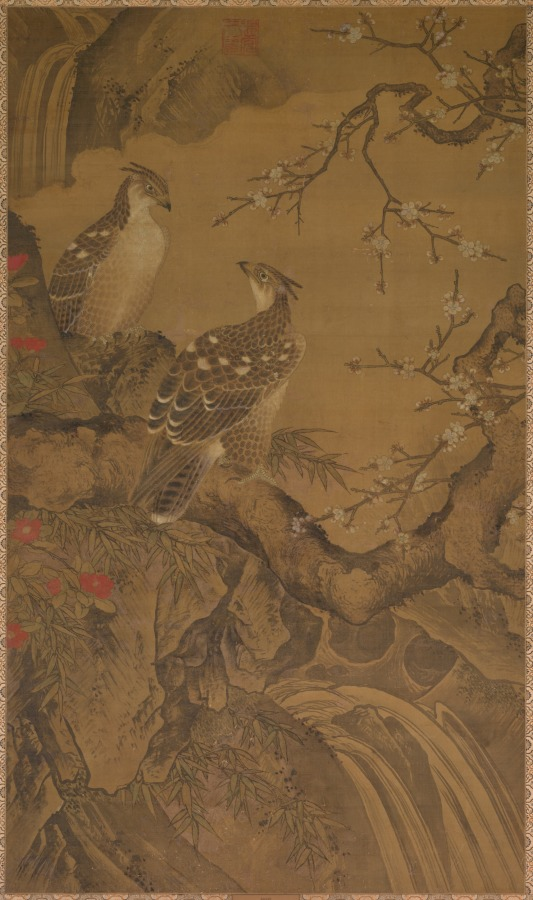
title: Eagles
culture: China, Ming dynasty (1368–1644)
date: 1368–1644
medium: Ink and color on silk panel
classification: Painting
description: Two eagles, painted in fine brushwork, perch on top of rocks surrounded by water, flowering camellia, and other vegetation, brushed in sweeping and broad strokes. Among birds, a favorite subject in Chinese painting, depictions of eagles can be traced back to at least the fourth century. Due to dramatic sociopolitical changes during the foreign-ruled Yuan (1279–1368) and native Ming dynasties, an elaborate symbolic language of the eagle developed. It can represent a vicious attacker, a courageous hero, or an enlightened emperor. In this painting, the two eagles are depicted peacefully resting in a lofty position, perhaps an idealistic image for a wise emperor and empress.